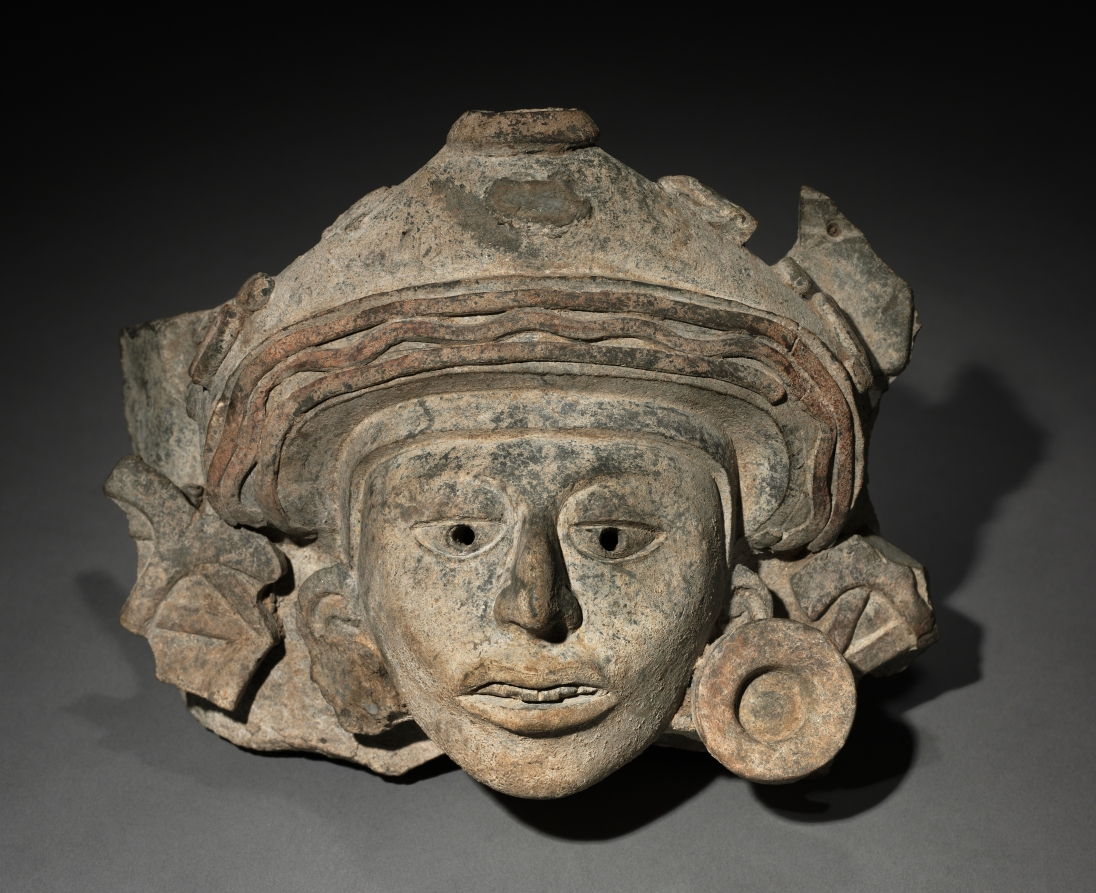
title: Urn Figure Head Fragment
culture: Mexico, Oaxaca, Zapotec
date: c. 200–500 CE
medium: earthenware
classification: Sculpture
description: The face of this fragmentary urn figure is modeled with exceptional sensitivity. The downward gaze of the drilled pupils imparts a sense of quiet alertness.